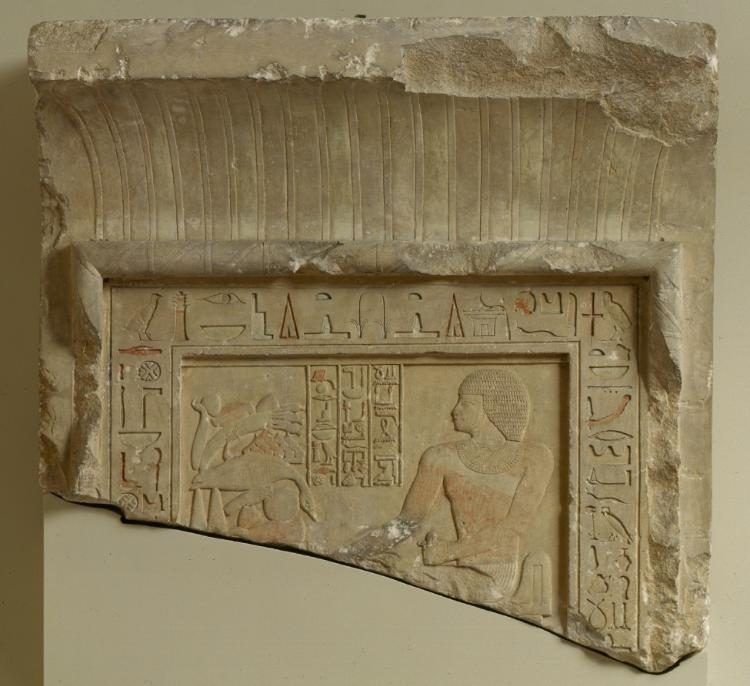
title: Stele of Shemai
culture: Egypt, Aswan, Qubbet el-Hawa, excavations of Lady William Cecil, 1904, "Cecil Tombs," no. 28, Middle Kingdom (2040–1648 BCE), Dynasty 12, probably reign of Senusret I (1971–1926 BCE)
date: c. 1960–1916 BCE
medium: painted limestone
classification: Funerary Equipment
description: Two techniques of relief carving are employed here: the scene of the deceased seated before a table of offerings and its accompanying inscriptions are in raised relief, while the border inscriptions are in sunk relief. The three columns of hieroglyphs in the center read: "The one honored before Osiris, lord of Busiris, the great god, lord of Abydos, that he [the god] may give invocation-offerings of bread and beer, oxen and fowl, travertine [vases] and clothing to the ka [vital spirit] of the chief of police, Shemai, vindicated."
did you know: This door-shaped stele honors a deceased chief of police named Shemai.